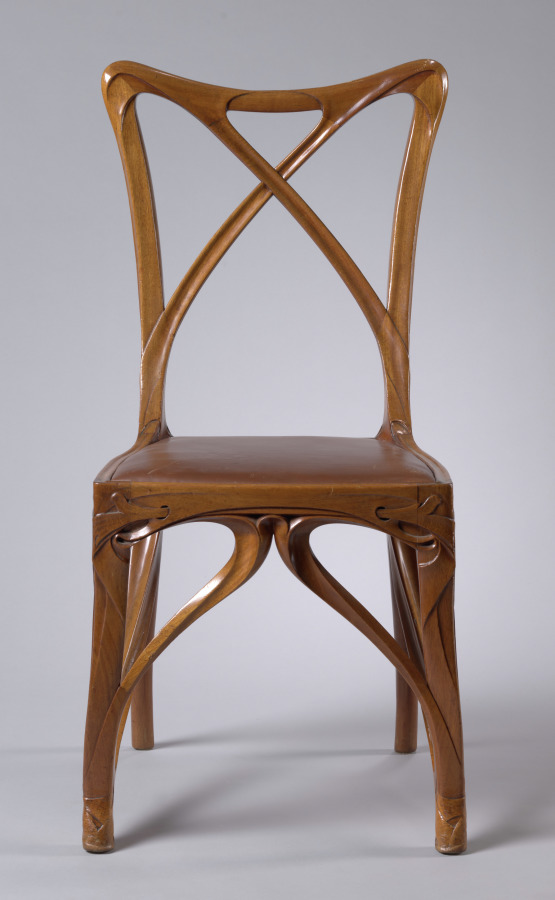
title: Side Chair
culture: France, Paris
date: c. 1900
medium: mahogany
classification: Furniture and woodwork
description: During the 1890s a new style emerged that reflected naturalistic and symbolic motifs found in Japanese and other Asian design. This movement rejected the historicism that had dominated architecture and design during the previous decades and took hold across Europe and America too. In France the style was known as "Art Nouveau," after the name of the gallery belonging to its chief proponent Siegfried Bing, the Maison de L'Art Nouveau (House of the New Art). This side chair typifies Art Nouveau style with its curving lines that seamlessly flow from one to another. This abstract use of curvilinear lines to create form and decoration was one of the major motifs favored by art nouveau designers to evoke naturalistic or organic design. Art Nouveau reached its apex at the 1900 world's fair in Paris, which was intended to herald the new century with a new style of art. However, critics and consumers alike soon rejected Art Nouveau as too sentimental in favor of newer motifs and styles as the moment passed. By 1905 it was all but forgotten.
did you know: This chair may have been designed by Parisian cabinetmaker Eugène Gaillard, who created a very similar design for the pavilion of Siegfried Bing at the 1900 world's fair in Paris.